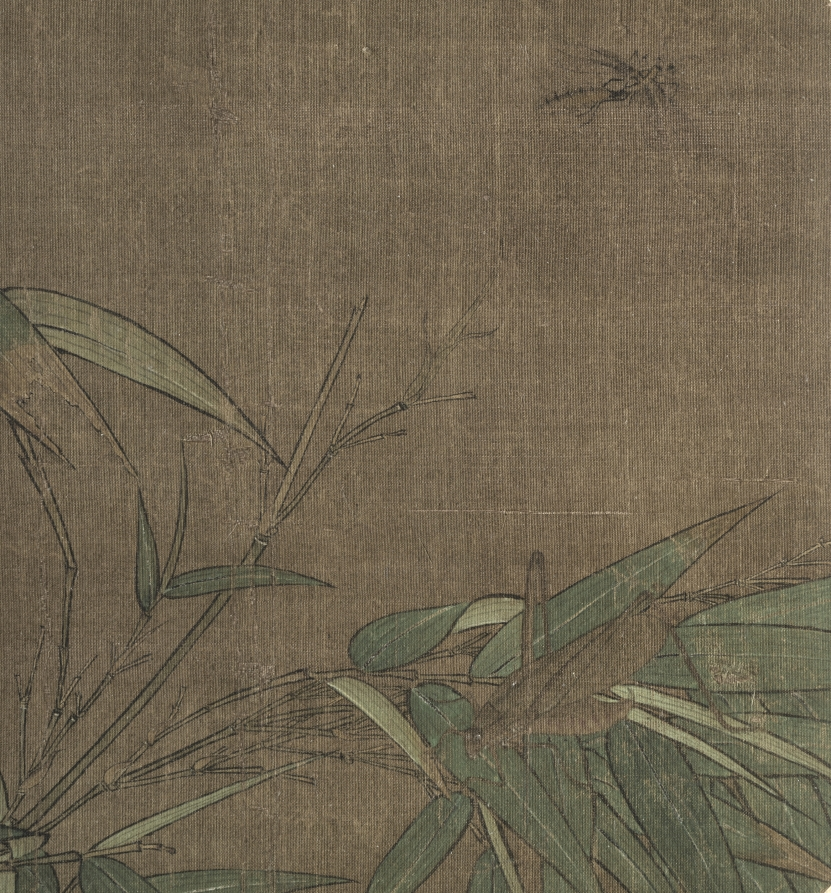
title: Bamboo and Insects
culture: China, Southern Song dynasty (1127-1279)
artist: Wu Bing (Chinese, active 1190–1194)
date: late 1100s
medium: Album leaf; fan painting, ink on silk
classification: Painting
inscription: Artist's signature at lower left: 吳炳 Wu Ping. 1 unidentified seal reading "Lo-hsi."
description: Wu Bing, a native of Piling, gained Empress Li’s favor and served as a painter-in-attendance at the court in Hangzhou during the Shaoxi reign (1190–94). The round fan painting shows a dragonfly hovering over a stalk of bamboo, a bush cricket (luowei) perching on a leaf, and a flying wasp. Yellow leaf tips suggest the late summer or early autumn season. The chirping of the cricket sounds similar to the sound of a working loom; the insect is therefore also called weaving lady (fangzhi niang). The weaving season starts when the weather is about to turn cold—the cricket symbolizes early autumn.